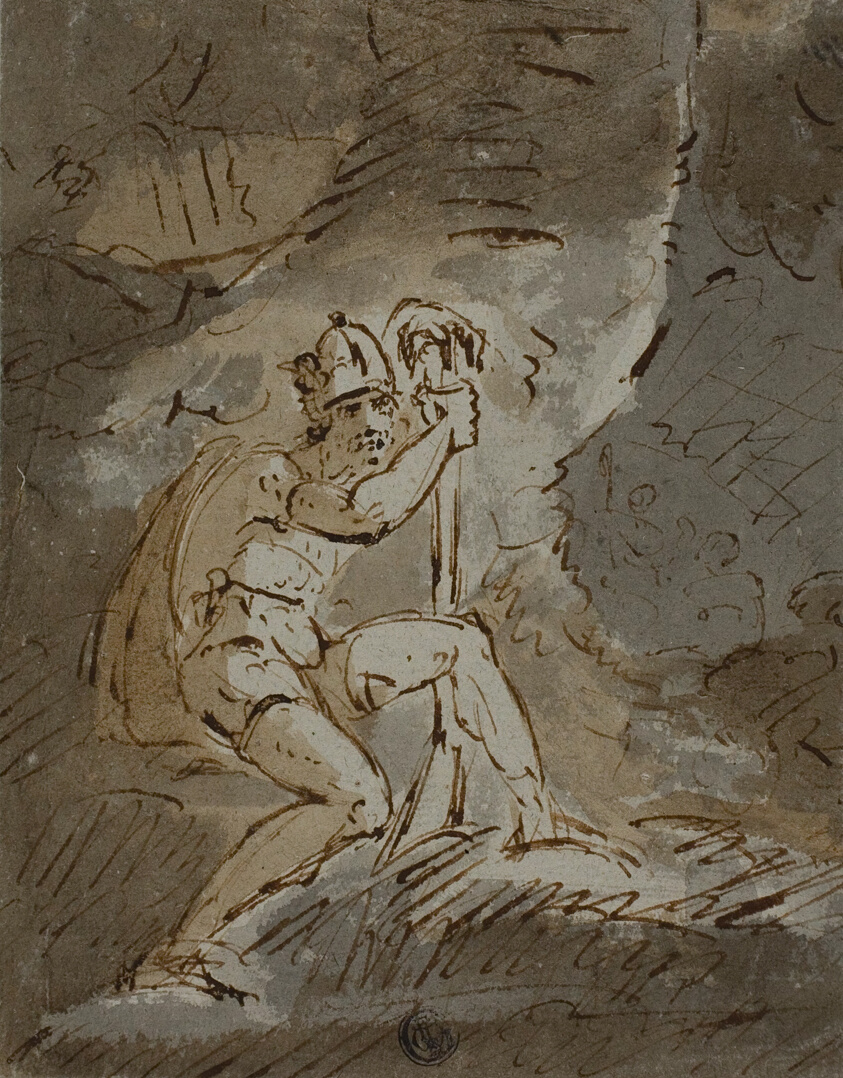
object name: Drawing and Watercolor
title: Helmeted Warrior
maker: John Hamilton Mortimer (English, 1740-1779); or Robert Ker Porter (English, 1777-1842); or John James Stewart (English, 1779-1849)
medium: Pen and brown ink, with brush and brown and gray wash, on gray laid paper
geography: England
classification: pen and ink drawings; drawings (visual works); prints and drawing